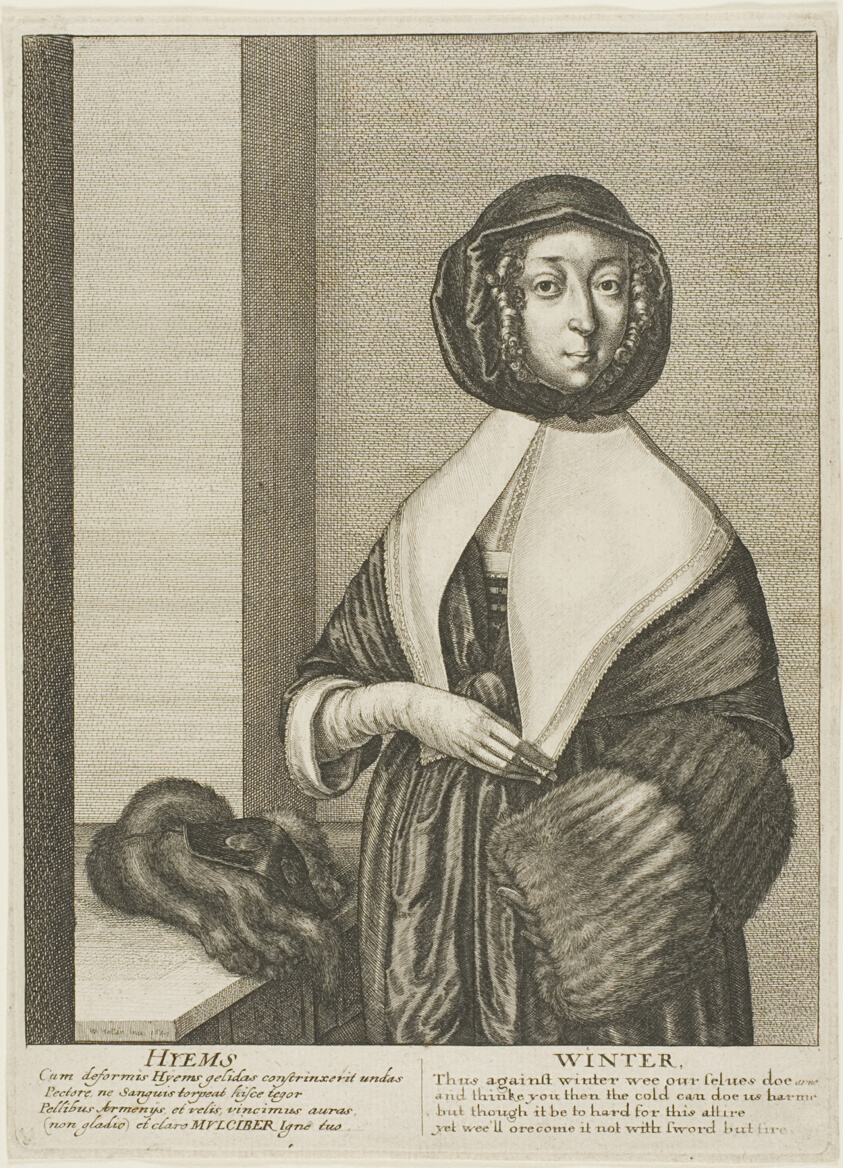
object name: Print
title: Winter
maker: Wenceslaus Hollar (Bohemian, 1607-1677)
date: 1641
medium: Etching on off white laid paper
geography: Bohemia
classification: etching; print; prints and drawing